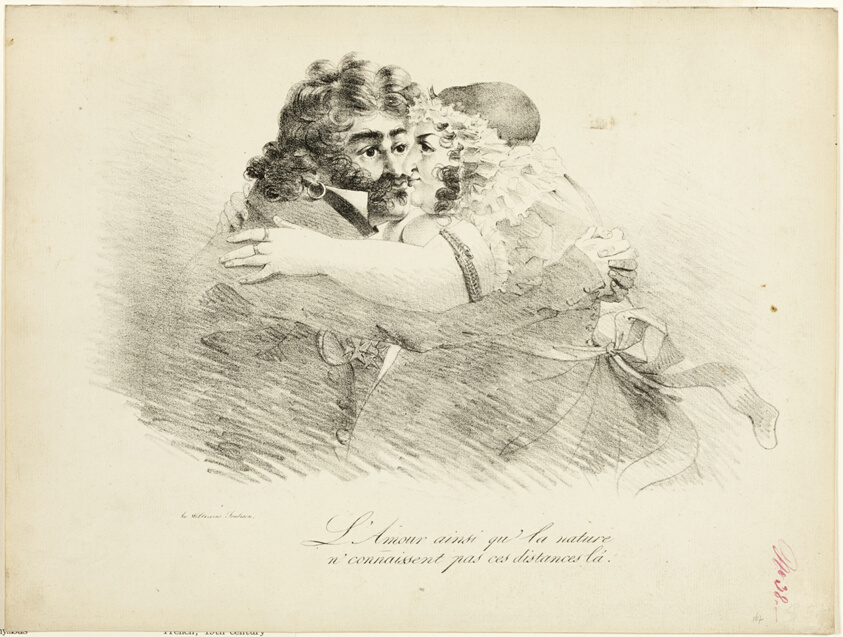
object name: Print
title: Love and Nature Do Not Know These Distances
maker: Unknown French artist; after William Johnson (English, 18th-19th century)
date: 19th century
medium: Lithograph in black on ivory laid paper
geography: France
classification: lithograph; print; prints and drawing